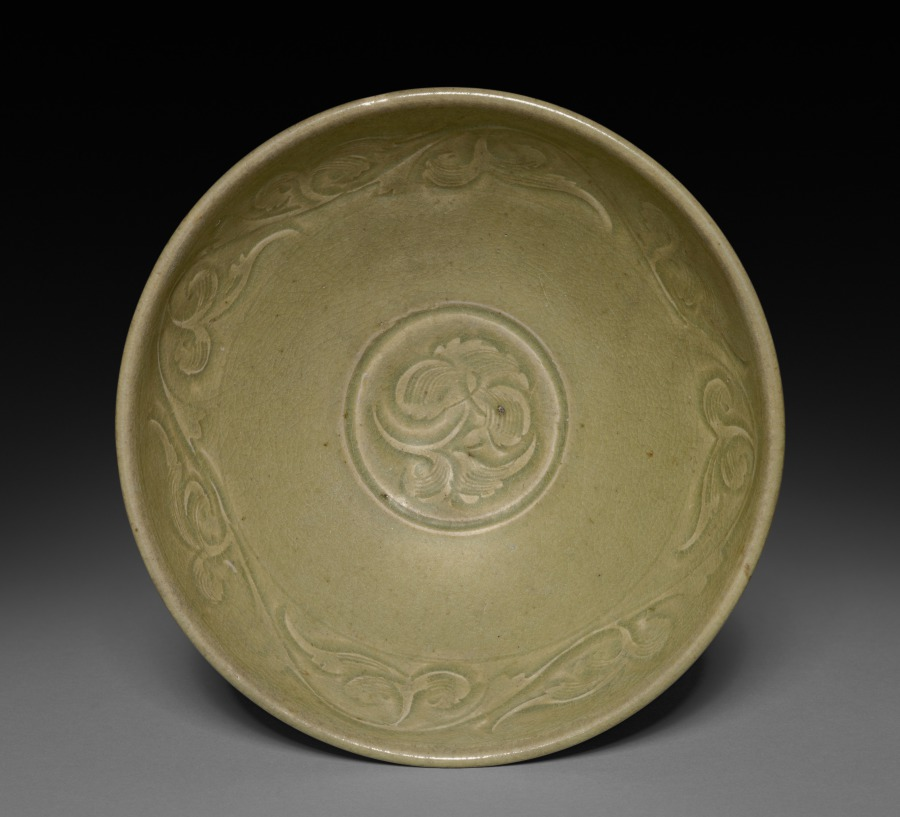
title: Bowl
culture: China, Jin dynasty (1115-1234)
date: 1100s-1200s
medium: Glazed light gray porcelain, Northern Celadon ware, Yaozhou type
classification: Ceramic